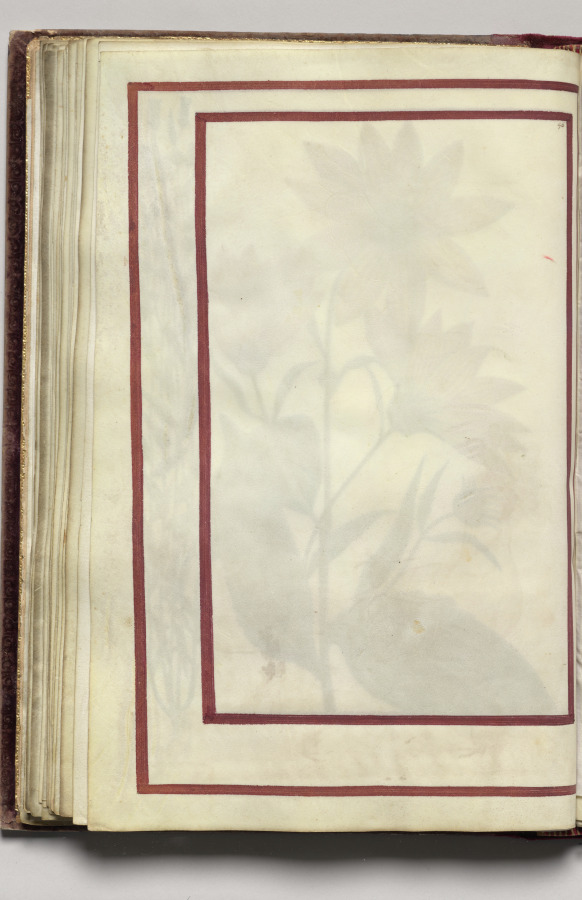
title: Border, folio 28 (verso), from Florilegium (A Book of Flower Studies)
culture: France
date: 1608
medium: watercolor, ink, silver and gold over occasional traces of pencil, on vellum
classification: Bound Volume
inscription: Dated: Poitiers 1608 (on frontispiece) Signed: On frontispiece in black ink, lower right: Van Kuyk Notation on drawing: Frontispiece: in pencil, lower margin: * élève de Van Kessel, peintre flammand (* in pencil also appears in front of Van Kuyk's name).